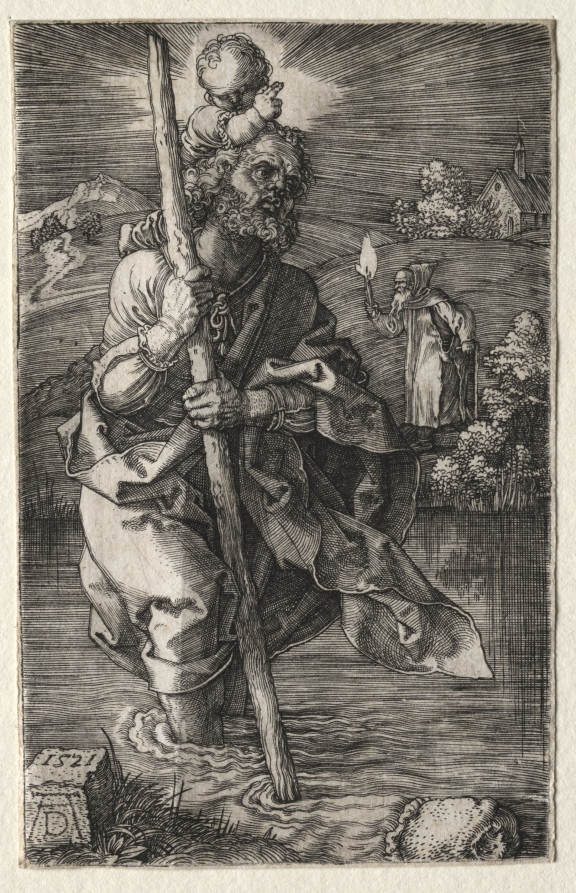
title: St. Christopher, Facing Right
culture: Germany, late 15th-early 16th Century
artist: Albrecht Dürer (German, 1471–1528)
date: c. 1496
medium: engraving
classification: Print